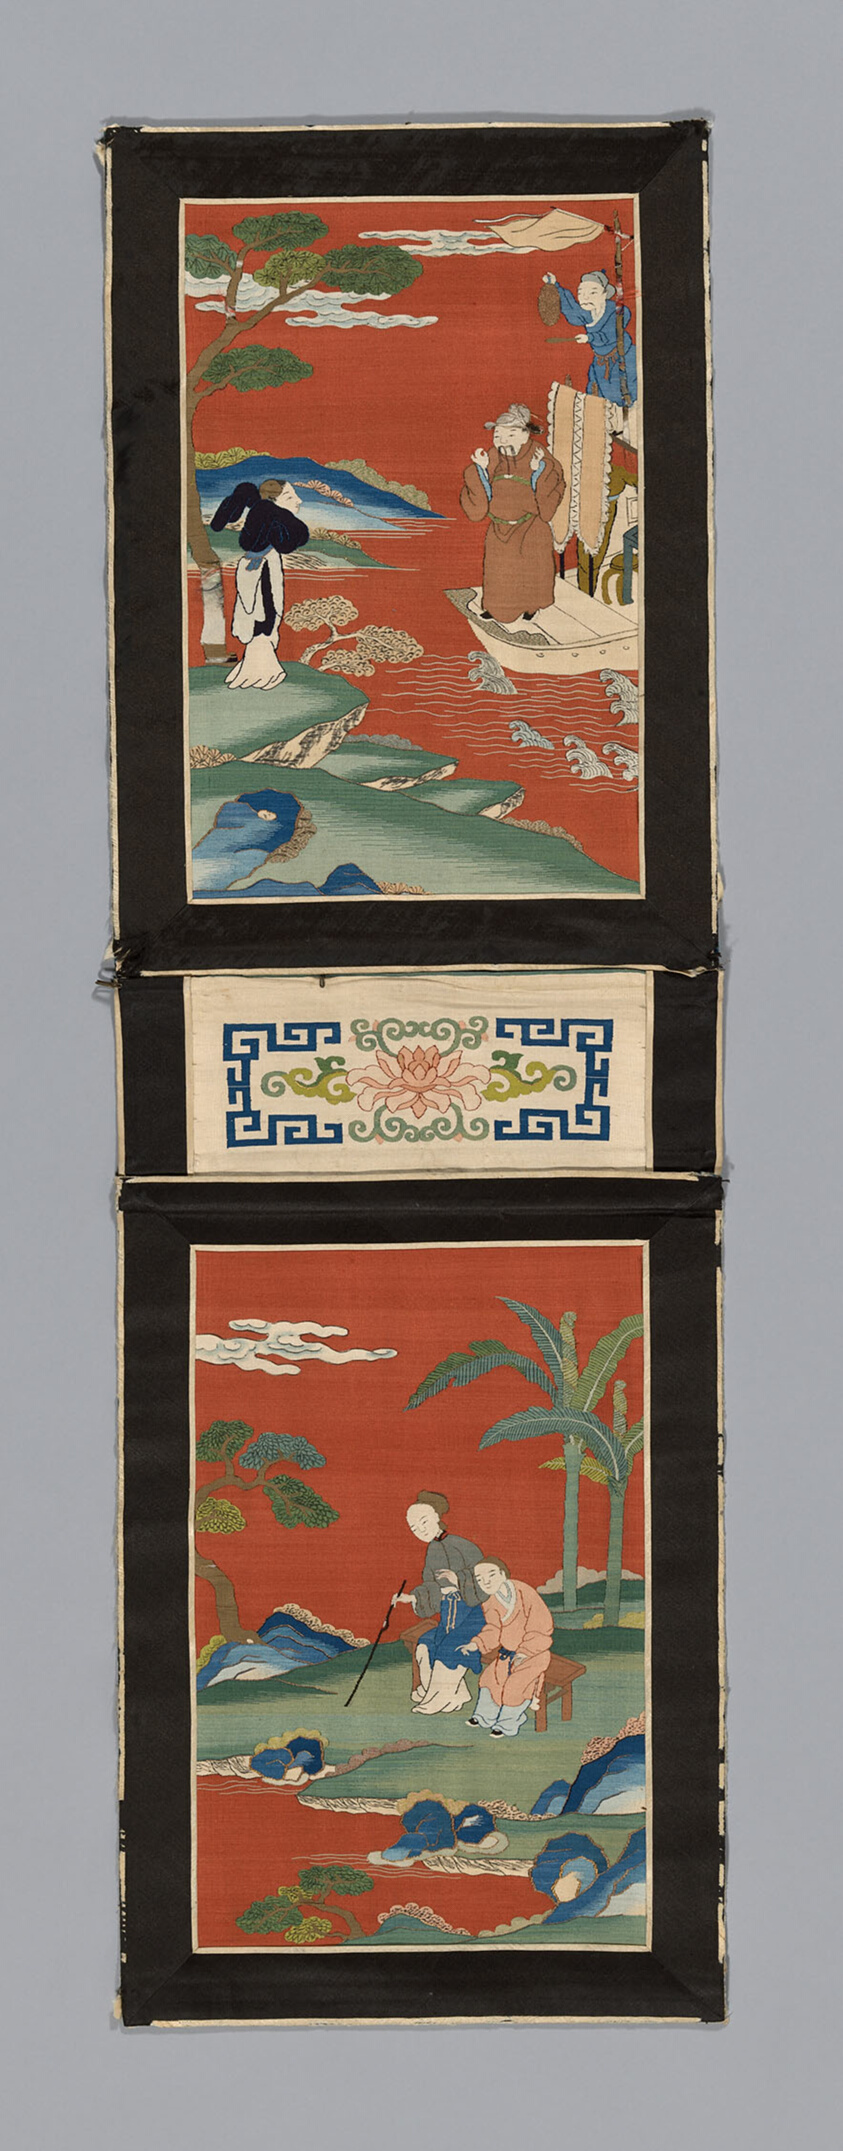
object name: Textile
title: Panel (For a Screen)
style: qing, Chinese (culture or style), asian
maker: China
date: Qing dynasty (1644–1911), 1875/1900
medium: Silk, gold-leaf-over-lacquered-paper-wrapped silk, slit tapestry weave with extended weft and interlaced outlining wefts; painted; borders: silk and cotton, warp-float faced 5:1 satin weave; inner and outer edges: silk, warp-float faced 4:1 satin weave; lining: cotton, plain weave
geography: China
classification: weaving - tapestry; weaving; textile